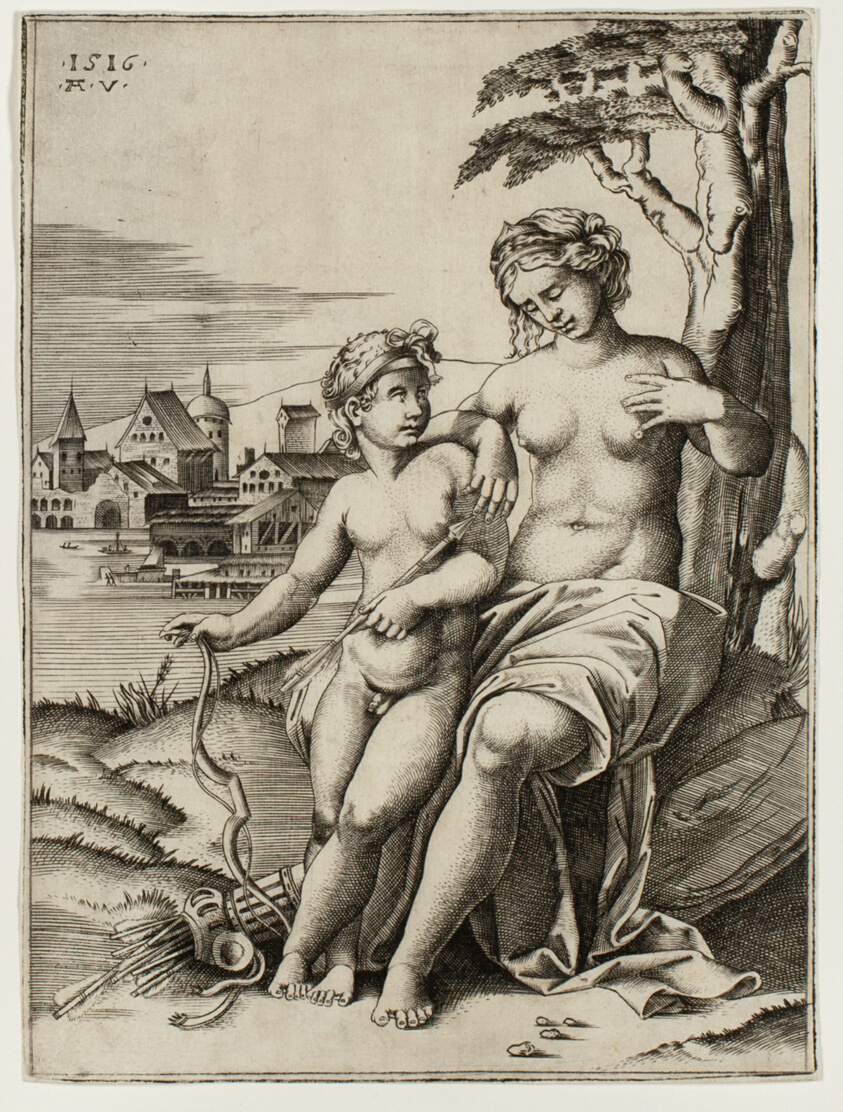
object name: Print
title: Venus Wounded by Cupid’s Dart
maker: Agostino Veneziano (Italian, active 1514–1536); after Raffaello Sanzio, called Raphael (Italian, 1483-1520)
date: 1516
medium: Engraving in black on cream laid paper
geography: Italy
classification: print; prints and drawing; engraving